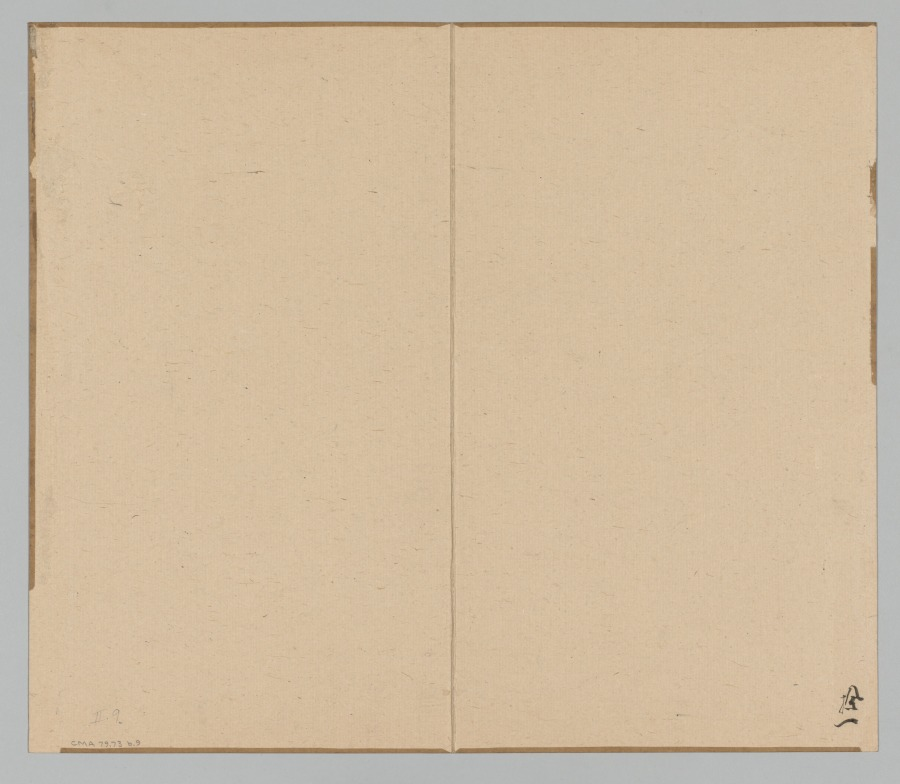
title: Reverberations of Taiga, Volume 2 (leaf 9)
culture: Japan, Edo period (1615–1868)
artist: Aoki Shukuya (Japanese, d. 1802)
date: mid- to late 1700s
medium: double-leaf from a pair of albums; ink and light color on paper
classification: Portfolio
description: Traditionally, young painters in Japan began their studies with an established master-painter. The master's compositions invariably became models that the apprentice copied to learn various ink and brush techniques. Shukuya was a pupil of the famous Kyoto artist Ikeno Taiga, whose style is reflected in these sketches of rocks, trees, and mountains.